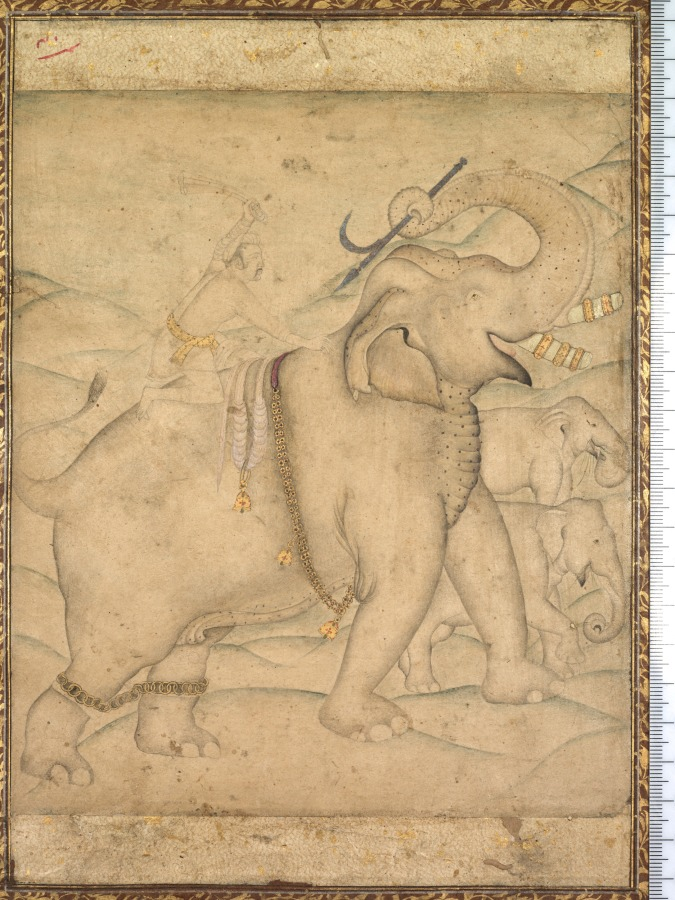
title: Portrait of Emperor Jahangir Riding an Elephant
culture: India, Mughal Dynasty (1526-1756)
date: 1700–1750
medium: drawing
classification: Painting